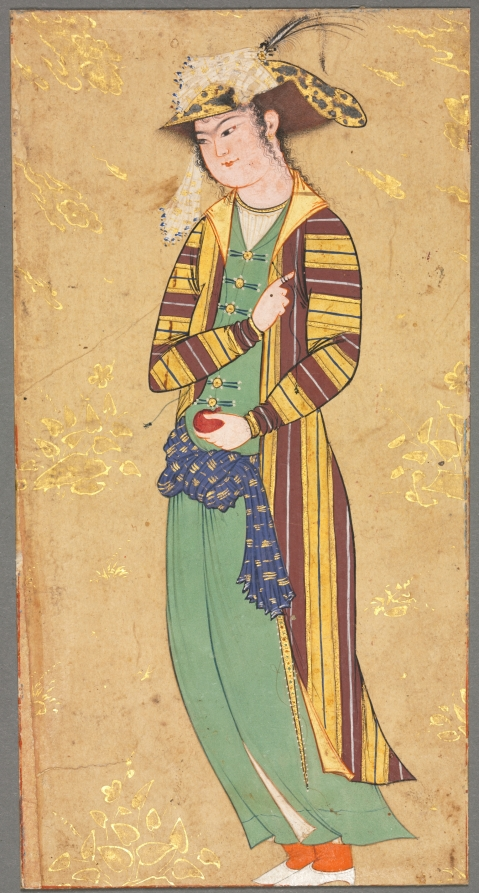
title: Youth Holding a Pomegranate; Illustration from a Single Page Manuscript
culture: Iran, Isfahan, Safavid period (1501-1722)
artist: style of Riza-yi Abbasi (Iranian)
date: c.1600–1650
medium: opaque watercolor and gold on paper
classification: Manuscript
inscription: script: none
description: This single painting of a youth holding a favored pomegranate reflects the style of the most gifted painter at the court of Shah ‘Abbas, Riza-yi ‘Abbasi, whose work inspired numerous adaptations and copies by other artists. In this painting, the youth is attired less extravagantly—with less gold thread than those in the two paintings nearby—presumably conveying a lower status. Gold thread was so expensive that rulers occasionally burned old fabrics for the monetary value of the gold.